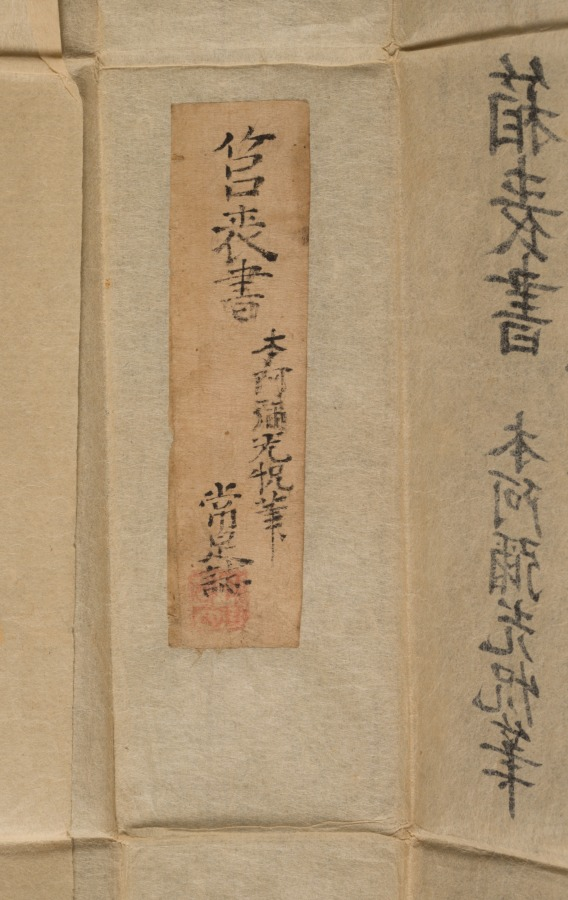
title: Hotei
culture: Japan, Muromachi period (1392–1573)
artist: Kichizan Minchō (Japanese, 1352–1431)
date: late 1300s–early 1400s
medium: hanging scroll; ink and slight color on paper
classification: Painting